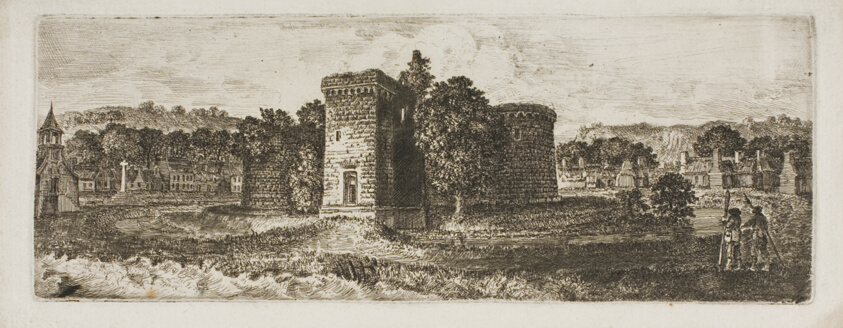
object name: Print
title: Rothesay Castle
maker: John Clerk of Eldin (Scottish, 1728-1812)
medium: Etching on paper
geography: Scotland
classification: etching; print; prints and drawing